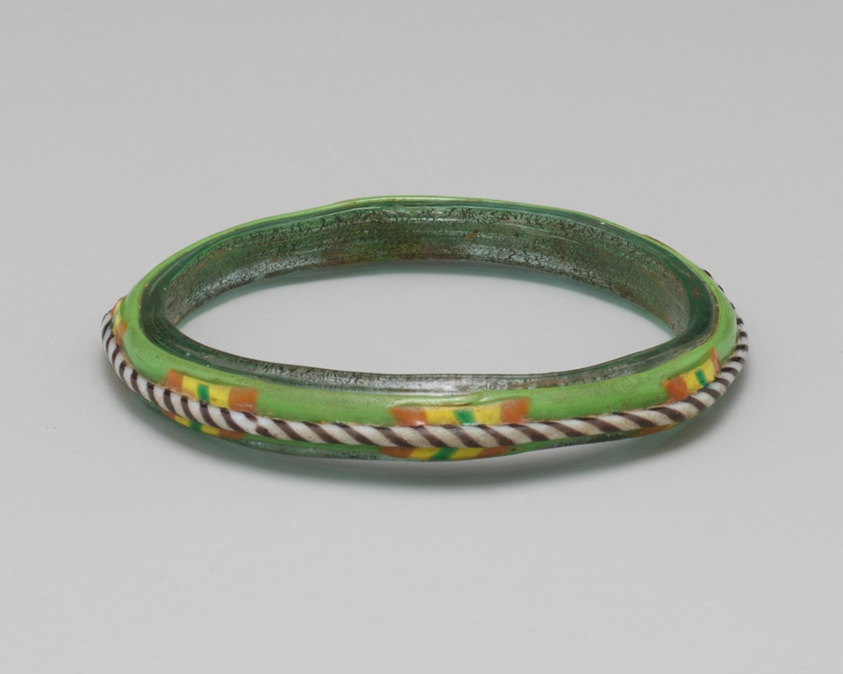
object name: Costume and Accessories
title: Bracelet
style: Islamic (culture or style)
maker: Islamic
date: 14th-15th century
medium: Glass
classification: glass; jewelry; ancient art; costume